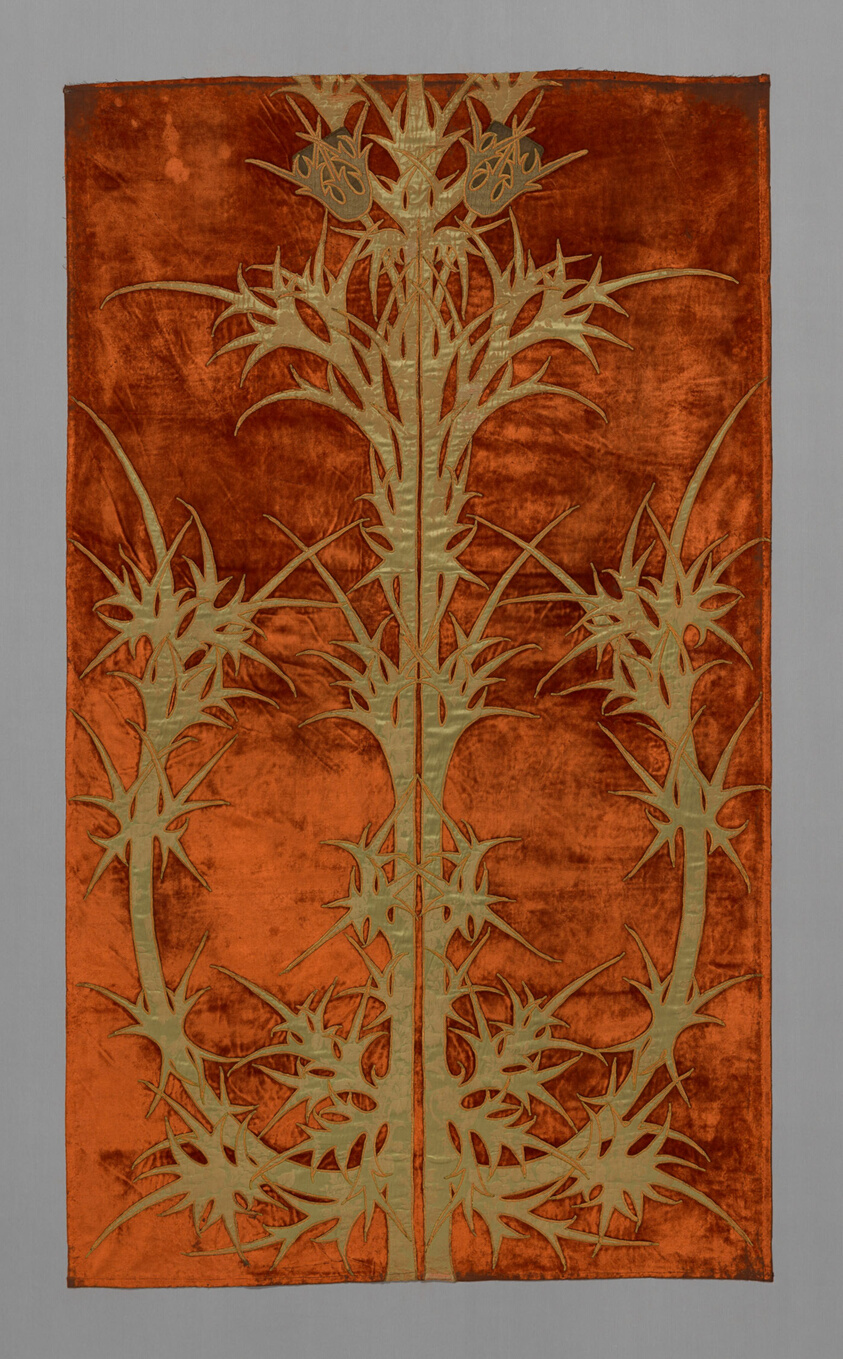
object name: Textile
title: Portière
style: Arts and Crafts Movement, Art Nouveau, 20th Century, American Arts and Crafts Movement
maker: Designed by George Washington Maher (American, 1864–1926); Possibly produced by Louis J. Millet (American, 1853–1923)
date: 1901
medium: Cotton and silk, plain weave with pile warps forming cut solid velvet; appliquéd with silk and cotton, satin damask weave; linen and gilt-strip-wrapped linen satin weave; cotton and silk plain weaves; embroidered with silk, cotton, linen, and gilt-metal-strip-wrapped linen threads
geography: United States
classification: textile; needlework (visual works)